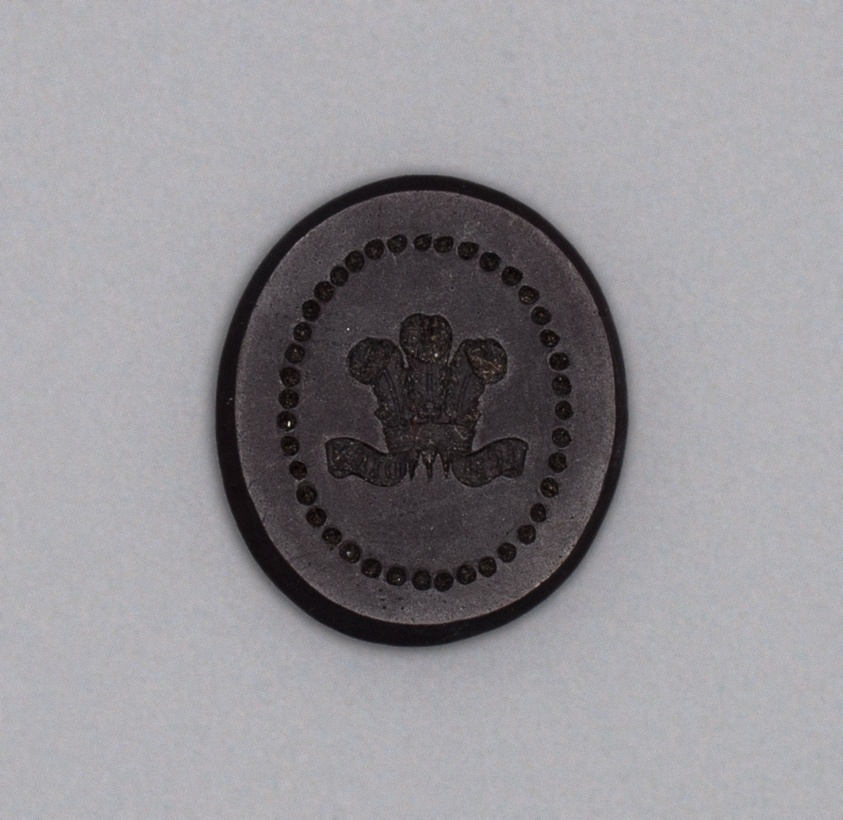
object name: Ceramics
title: Intaglio with Crest of Prince of Wales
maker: Wedgwood Manufactory (England, founded 1759)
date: Late 18th century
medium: Stoneware (basaltware)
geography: Burslem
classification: sculpture; stoneware; european decorative arts; ceramics